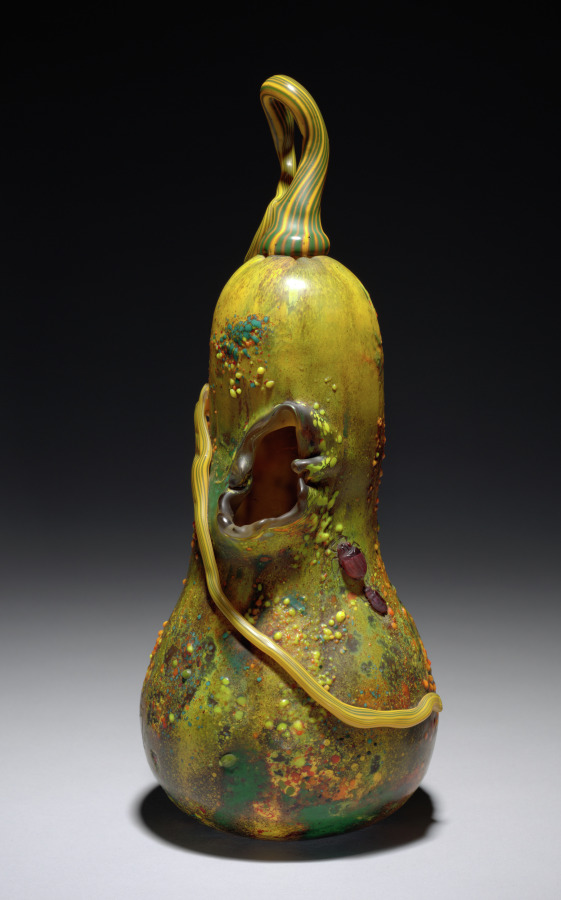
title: Vase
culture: France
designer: Daum Frères (French, founded 1875)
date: c. 1910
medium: Blown, cast, and vitrified glass with applied, wheel-engraved decoration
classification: Glass